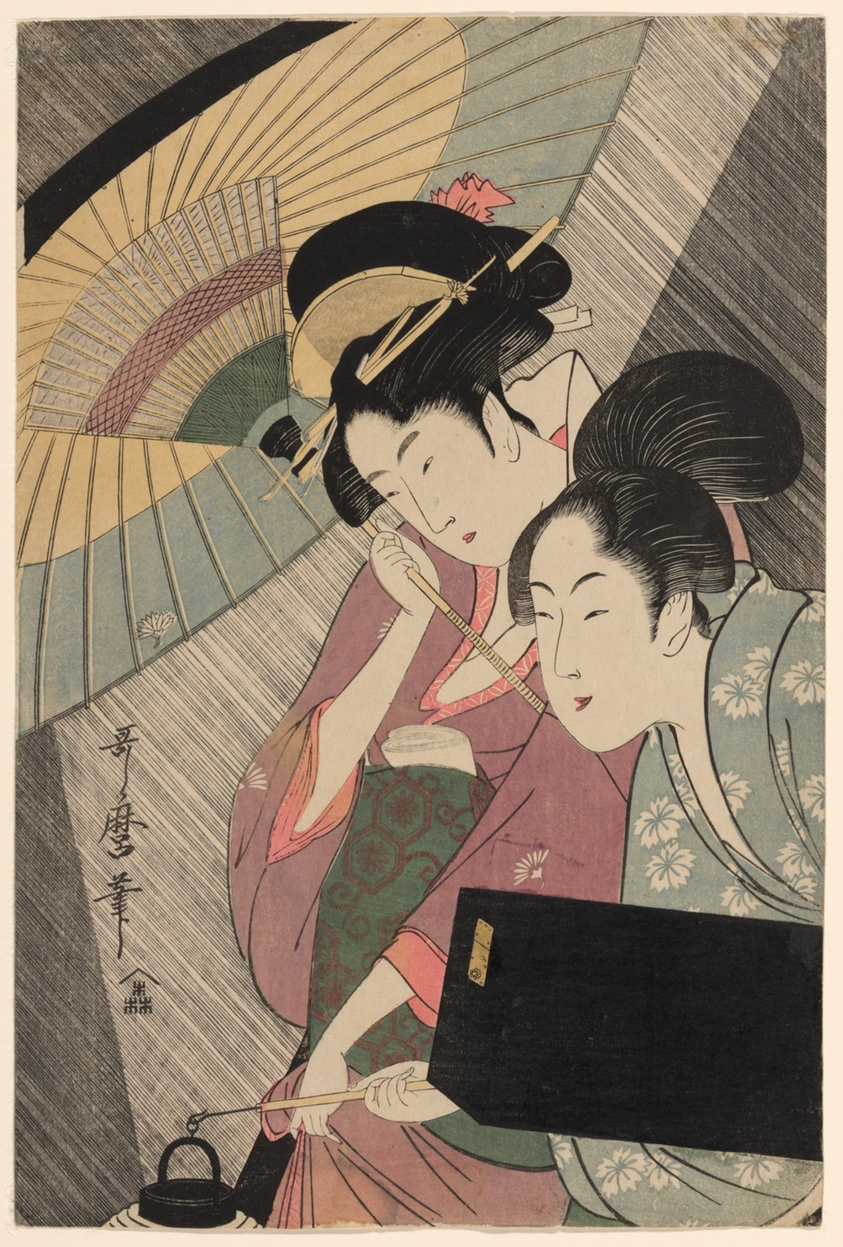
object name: Print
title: Geisha and Attendant on a Rainy Night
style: Japanese (culture or style)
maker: Kitagawa Utamaro 喜多川 歌麿; Japanese, 1753 (?)-1806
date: c. 1797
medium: Color woodblock print; oban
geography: Japan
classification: woodblock print; print; asian art